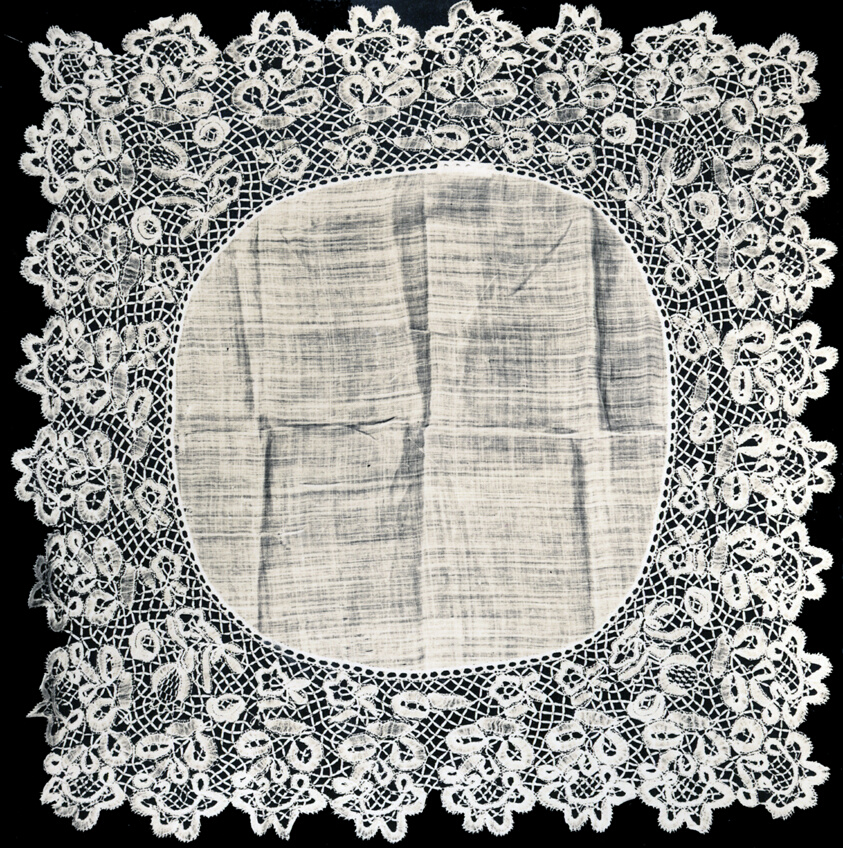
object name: Textile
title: Handkerchief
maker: England, Honiton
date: 1850/75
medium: Linen, plain weave; with edge of cotton and linen, bobbin part lace of a type known as "Honiton" with a "wheat-ear" ground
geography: England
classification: textile; lace - bobbin